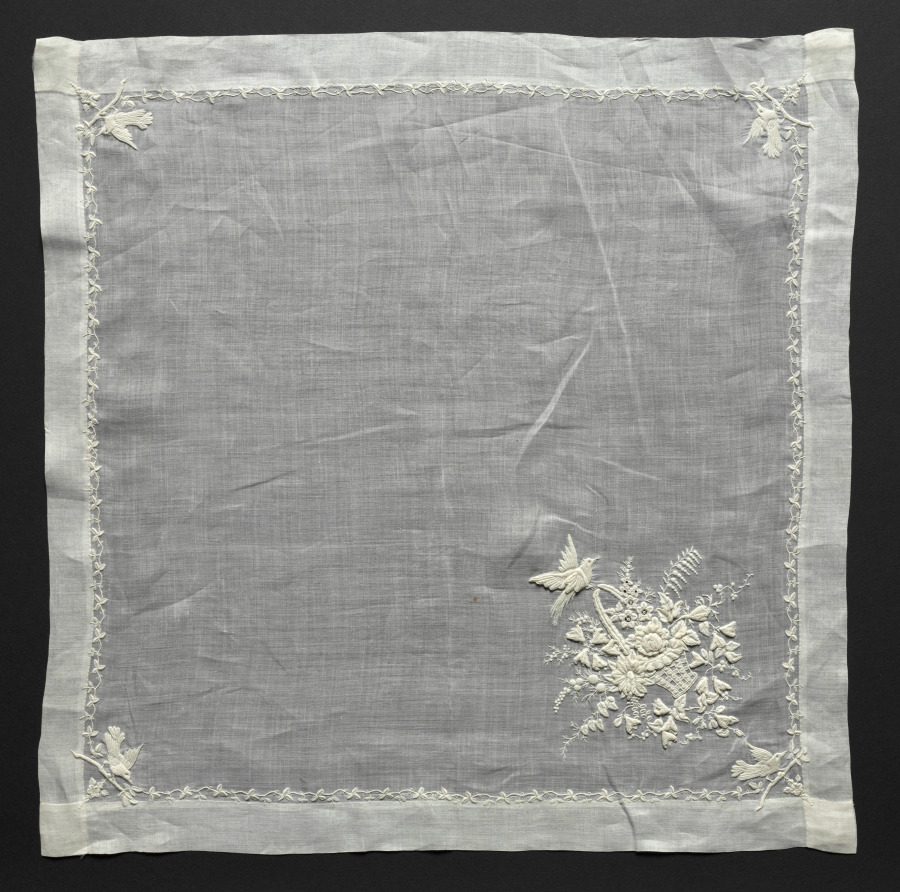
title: Handkerchief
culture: Switzerland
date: 1800s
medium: Plain weave linen: raised embroidery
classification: Embroidery